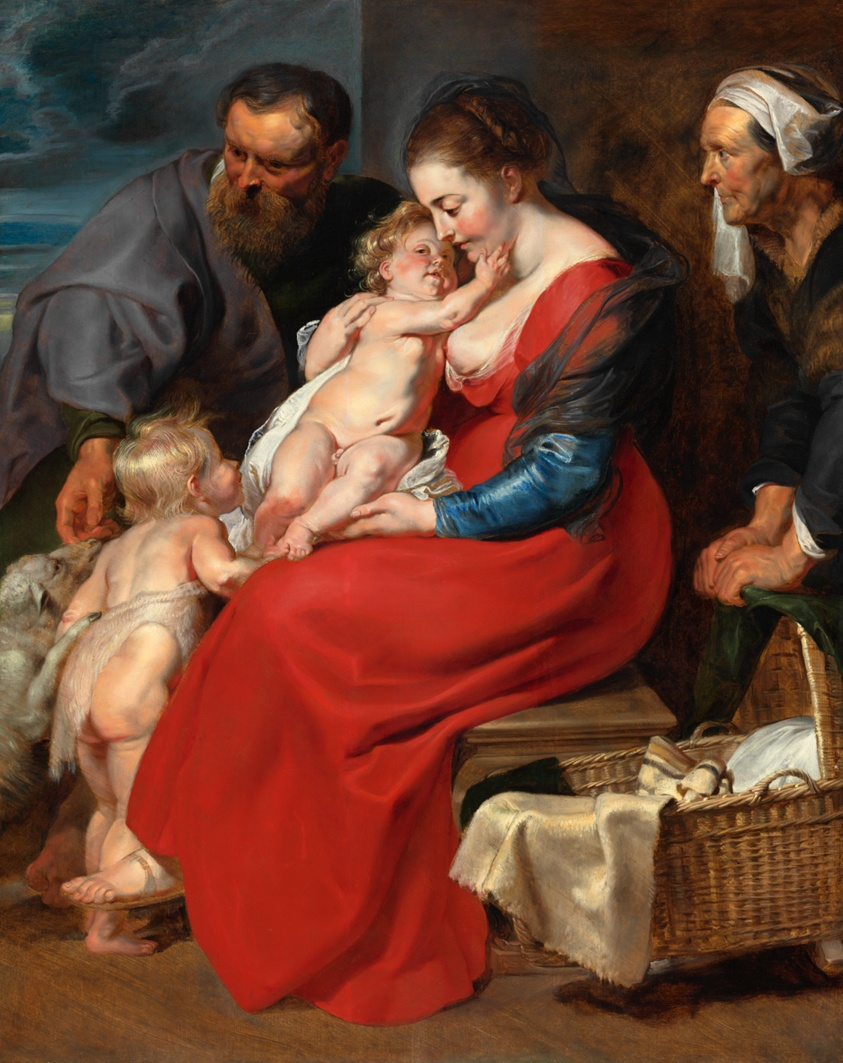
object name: Painting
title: The Holy Family with Saints Elizabeth and John the Baptist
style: 17th Century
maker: Peter Paul Rubens (Flemish, 1577–1640)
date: c. 1615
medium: Oil on panel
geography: Flanders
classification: oil on panel; paint; painting; european painting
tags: religion, children, Saint Elizabeth, Saint John the Baptist, saints, babies, Christian subjects, Christianity, dresses, holy family, mothers, red (color), Virgin and child/Madonna and child, Virgin Mary